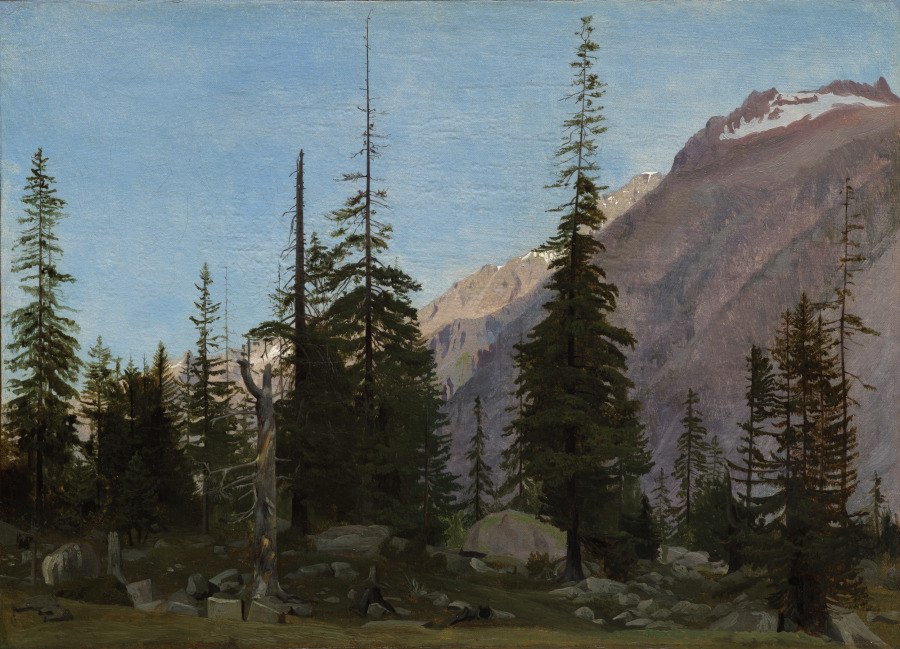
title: Alpine Landscape: The Handegg, Switzerland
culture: France, 19th century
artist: Jean-Léon Gérôme (French, 1824–1904)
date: 1850s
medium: oil on fabric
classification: Painting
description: This painting depicts a mountain peak near Handegg, a village just south of Lucerne, Switzerland. Tall fir trees reach upward from the dark foreground toward the light, which illuminates the sky and snowcapped mountains. Rising like church steeples, the trees almost touch the top of the canvas, conveying a feeling of spiritual striving. This expression of romantic, almost religious sentiment inspired by the power and beauty of nature is surprising for Gérôme, one of the leading artists of academic realism, a style distinguished by firm, precise drawing­.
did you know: In 1851, Gérôme decorated a vase for Emperor Napoleon III of France which was offered to Prince Albert of England and is now part of the Royal Collection at St. James’s Palace, London.